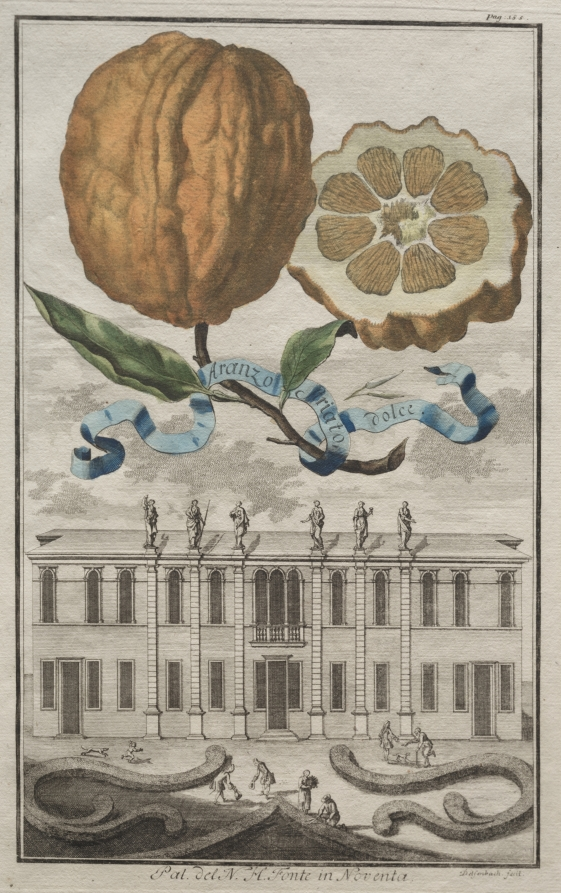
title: Nurnbergische Hesperides: No. 185 - Aranzo Striato dolce. Palazzo del N. H. Fonte in Noventa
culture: Hungary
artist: Joseph de Montalegre (Hungarian)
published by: Johoann Christoph Volckamer (German)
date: c. 1708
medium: engraving, hand-colored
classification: Print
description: The title of this set refers to Hercules, a mythological figure who must complete a series of difficult tasks. One of these was procuring the golden apples of the Hesperides, the nymphs who guarded this precious fruit. Hesperides also refers to books on citrus fruit, as it was once thought that the golden apples were actually Spanish oranges.